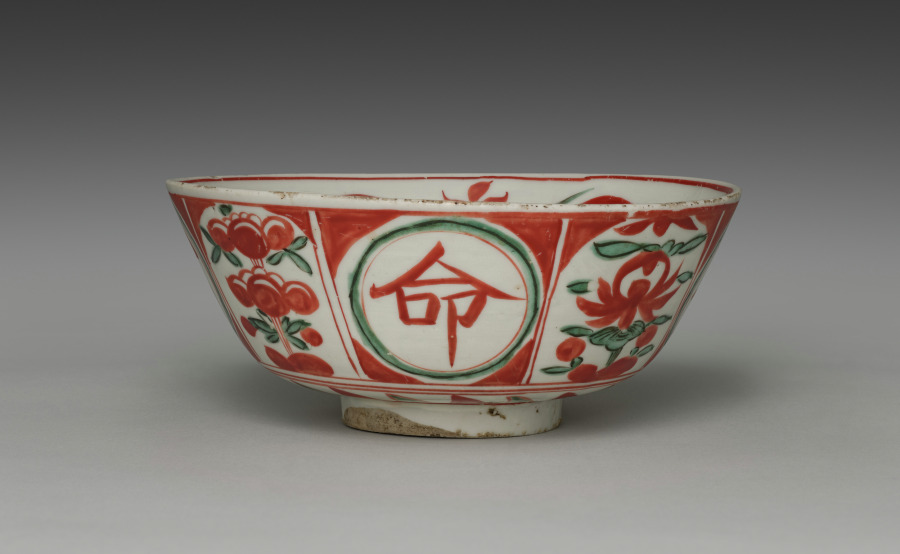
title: Bowl with Auspicious Ideographs and Floral Motifs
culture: China, Ming dynasty (1368–1644)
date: 1600s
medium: Stoneware with overglaze color enamels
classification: Ceramic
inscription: 長,命,富,貴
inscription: 【印】清風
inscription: 【印】大日本清風造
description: As part of their work, members of the Seifu studio, and Seifū Yohei III (三代清風与平, Japanese, 1851–1914), in particular, engaged in the viewing and appreciation of Chinese ceramics. While they were not authenticators, they would have been familiar with imported examples of Chinese stoneware and porcelain through tea gatherings, meetings with their elite clients, exhibitions, and other opportunities to see and study actual pieces from the mainland. This object and its box may be a reflection of Yohei III’s experiences of this kind. The bowl itself is slightly misshapen and roughly glazed with overglaze color enamels in red and green. Flanked by floral motifs, four Chinese characters brushed in red appear in roundels: 長命富貴. Meaning, respectively, longevity, life, prosperity, and status, they are pronounced together in Japanese as the phrase chōmeifūki, or “live long and prosper.” Additional loosely painted foliate designs in red and green circle the area above the foot and inside of the bowl. It is a relatively simple piece made by someone who was likely capable of much finer, more precise work but who could also do completely passable wares on short order. Of greater interest is the storage box lid for this piece. It has an inscription by Yohei III, with his seal, declaring it to be a “sweets dish from southern China with color images.” On the reverse of the lid, Yohei has written his name and placed his Imperial Household Artist seal, but instead of writing “made by,” he wrote “saw this [ceramic].” To the left of this is another inscription in a different hand, stating that the piece is a work from southern China with red-painted designs, produced at the very end of the Ming dynasty. It is signed “Kushi Takushin 久志卓真," along with his seal. Kushi Takushin (1898–1973) was a Japanese musician and music critic, as well as an antiques researcher and authenticator. He was especially interested in Ming dynasty Chinese ceramics and wrote extensively on Chinese, Japanese, and Korean ceramics. Originally from Hokkaido, he was active in Kyoto and began collecting art at a young age. Both he and Yohei appreciated and commented upon the bowl, and perhaps they both owned it.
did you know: Each roundel contains an auspicious word conveying good wishes for a long life and wealth.